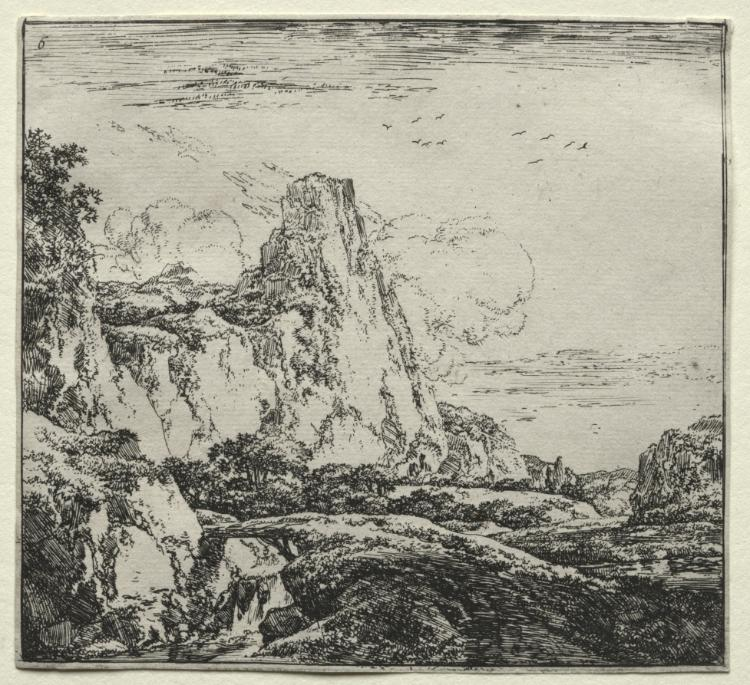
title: The Bridge near the Mountain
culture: Flanders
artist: Herman Naiwincx (Flemish, c. 1624–after 1651)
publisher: Clement de Jonghe (Dutch, 1579–1679)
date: 1640–51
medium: etching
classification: Print